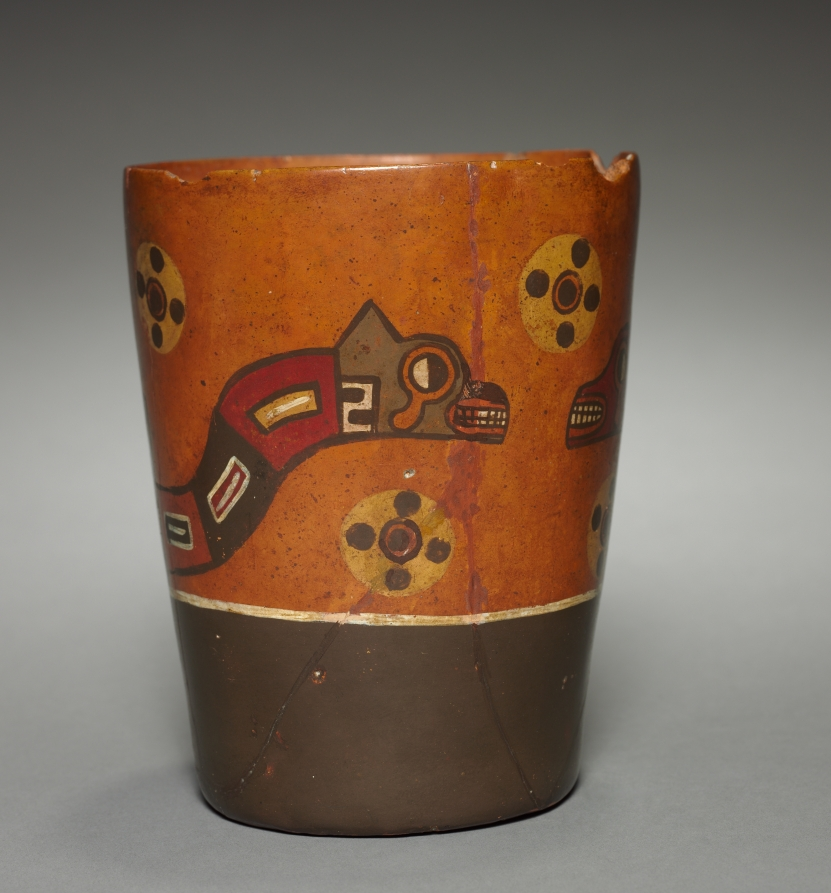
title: Kero-shaped Vessel (modern version of a Wari-style vessel)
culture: Peru, modern, 20th century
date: before 1955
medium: pottery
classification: Forgery